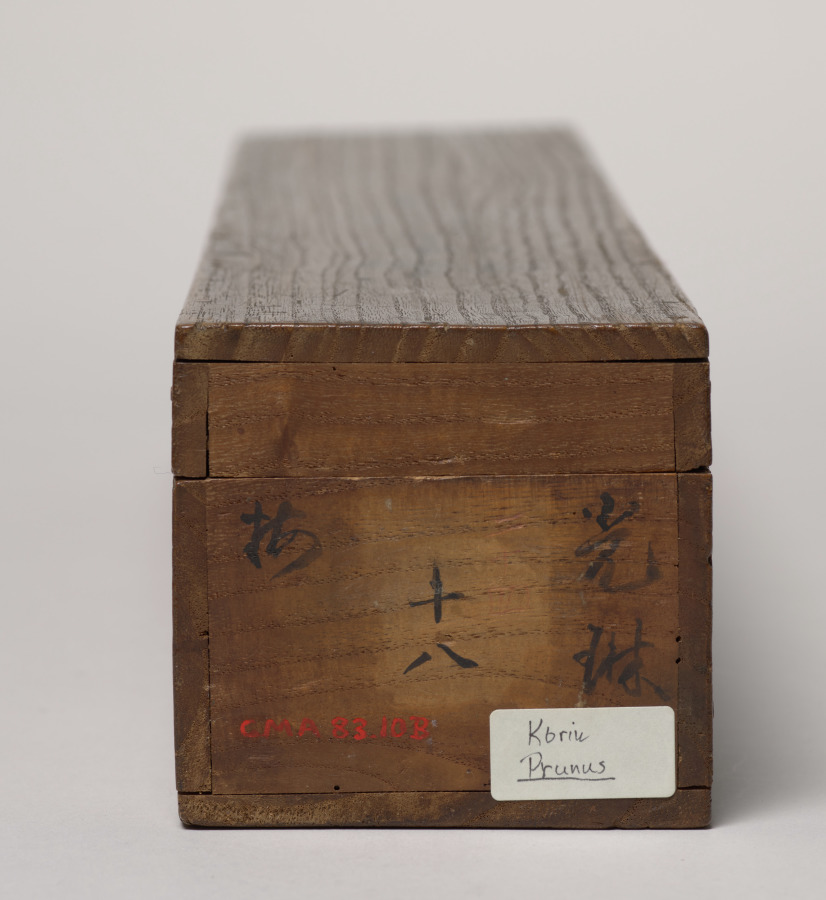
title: Plum Tree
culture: Japan, Edo period (1615–1868)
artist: Ogata Kōrin (Japanese, 1658–1716)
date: c. 1700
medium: hanging scroll; ink on silk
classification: Painting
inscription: Artist's signature and seal above hillock bottom right corner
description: Ogata Kōrin had to think through his design carefully to create these white plum blossoms and deliver their effect, as he used the reserve technique—where selected areas of the painting surface are left unpainted—to achieve it. He probably roughed in the tree before applying an ink wash to the entire silk surface, except where he intended to place the flowers. He likely then returned to articulate the petals and, in some cases, the pistils and stamens. The composition shows the tree twisting out of view, only to return with a branch of new growth jabbing forth from an old, broken limb, thereby heightening the visual impact of the blossoms.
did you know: The Rinpa style of painting is named for Ogata Kōrin, even though he did not create it.